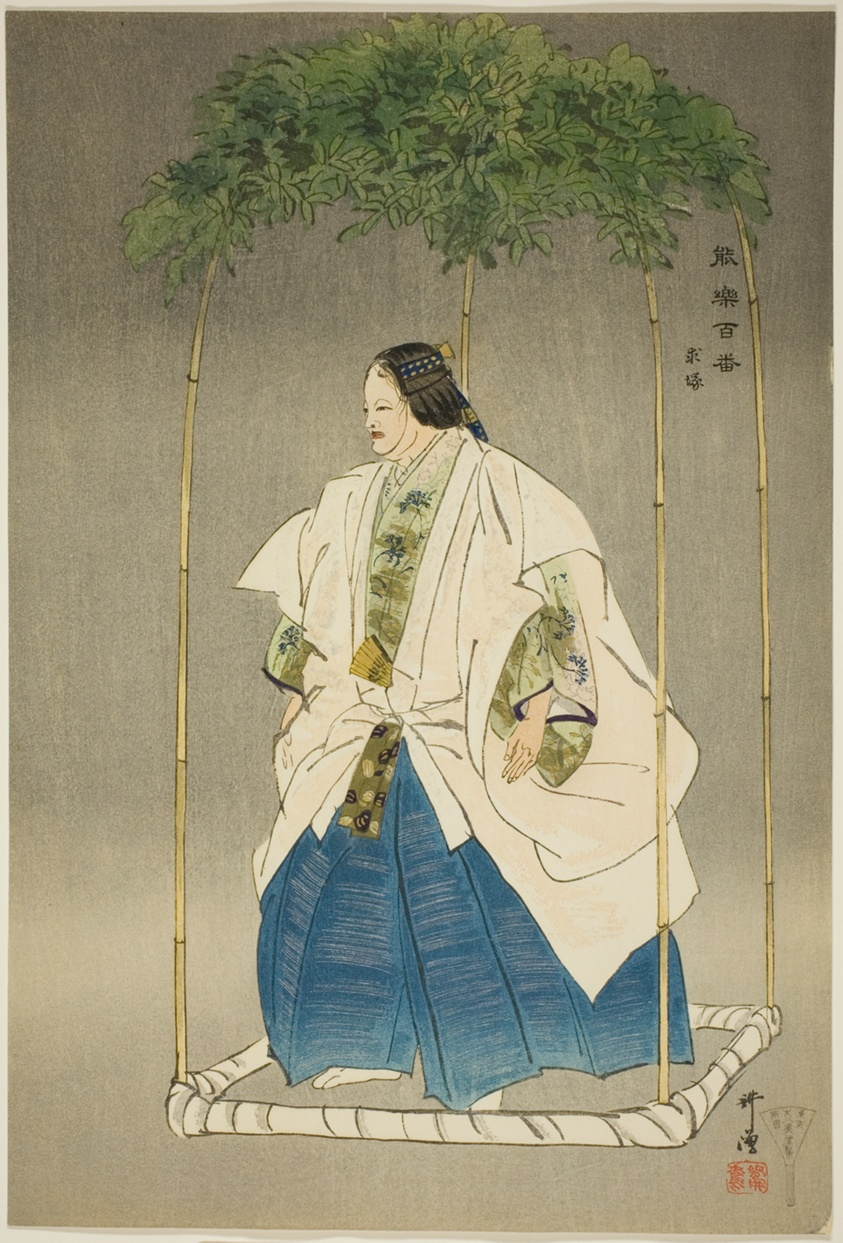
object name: Print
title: Motome-zuka, from the series "One Hundred No Dramas (Nogaku hyakuban)"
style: Japanese (culture or style)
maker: Tsukioka Kogyo; Japanese, 1869-1927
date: 1898/1903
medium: Color woodblock print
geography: Japan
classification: woodblock print; print; asian art